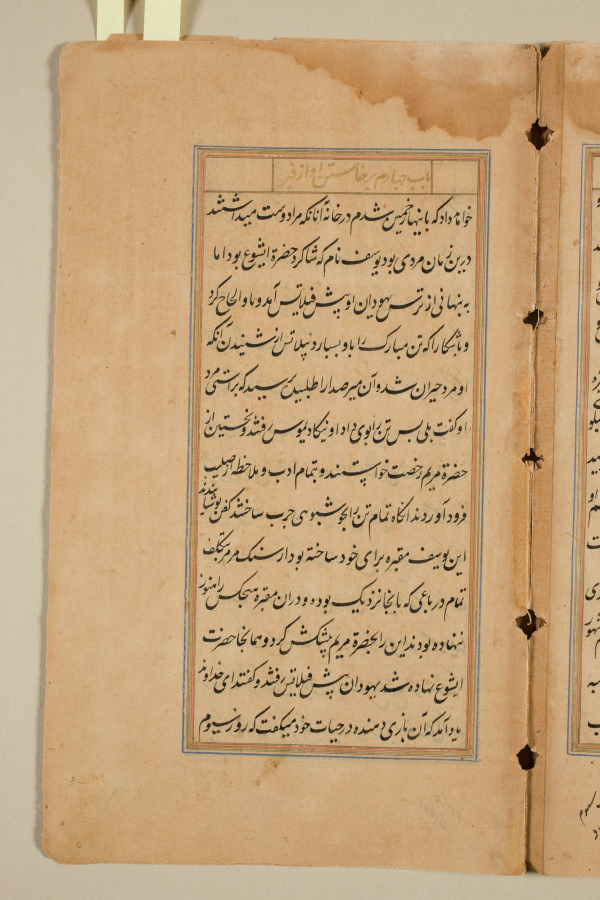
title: Text page from a Mirror of Holiness (Mir’at al-quds) of Father Jerome Xavier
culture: Mughal India, Allahabad, made for Prince Salim (1569–1627)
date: 1602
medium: Ink and gold on paper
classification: Manuscript